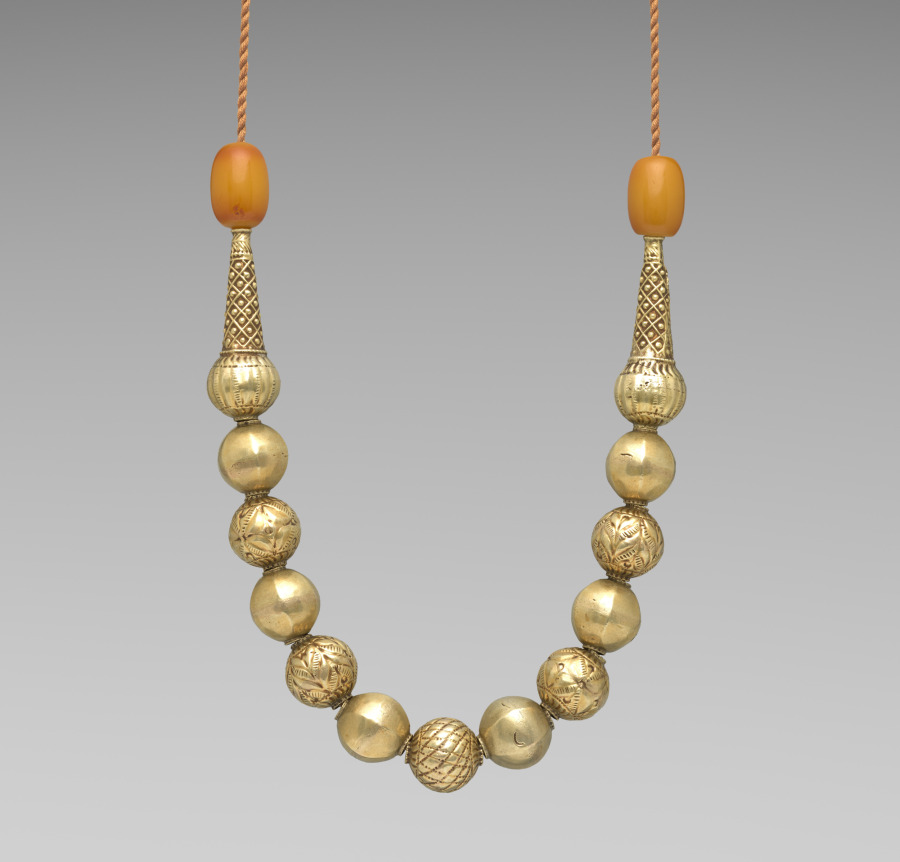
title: Necklace (muriya or murriyya)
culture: Africa, East Africa, probably Harar, Ethiopia, unknown silversmith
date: late 1800s or early 1900s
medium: gilt silver, tree resin (possibly copal)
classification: Jewelry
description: This necklace is from is from the Ethiopian city of Harar, where it was worn only by Muslim women. It was part of the bridal trousseau. The spherical silver beads of this muriya necklace resemble Muslim prayer necklaces. Its warm yellow Baltic amber or Zanzibari copal simultaneously conveyed the wearer’s married status and her access to imported goods. Ornate filigree jewelry was historically made in Ethiopia for royals and nobility by specialized silversmiths trained through long apprenticeships. Customers were generally female, while silversmiths are always male.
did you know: Besides archaeological examples, the oldest known Ethiopian jewelry dates from the 1840s; damaged items were typically melted down to make new pieces or to use during times of hardship.